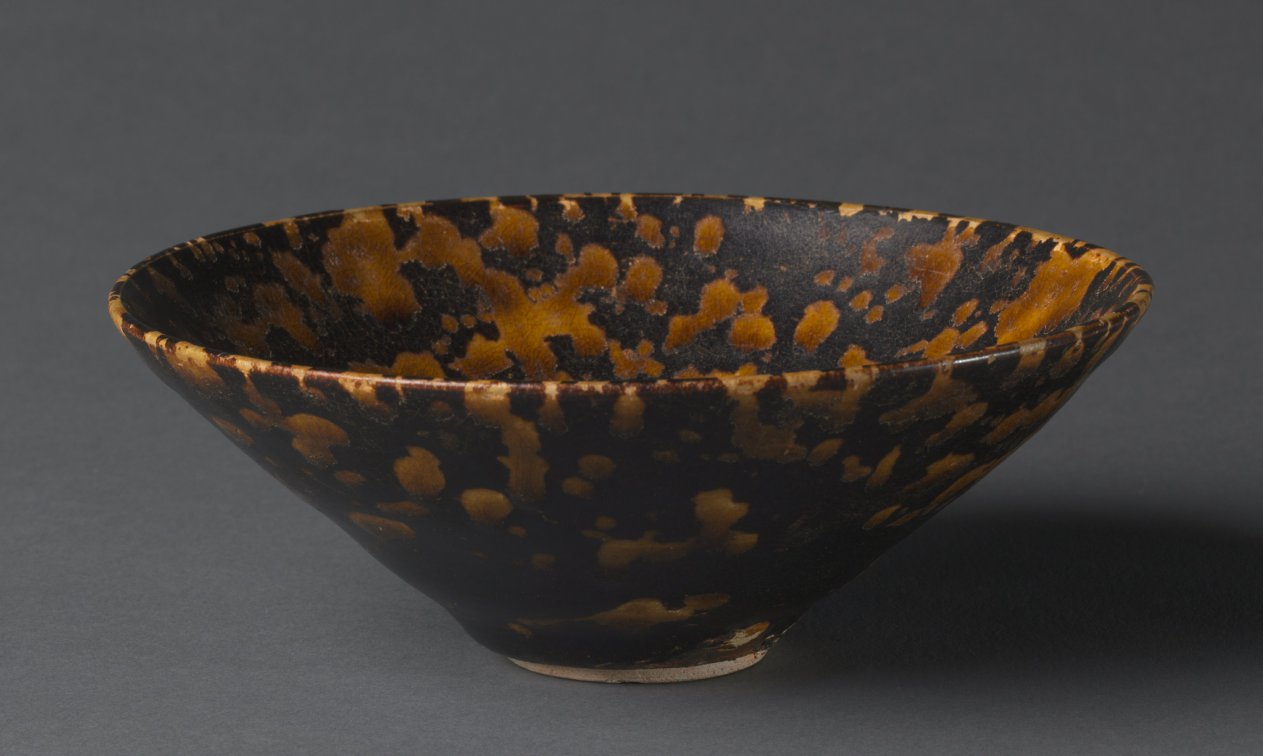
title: Conical Bowl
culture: China, Jiangxi Province, Ji'an, Southern Song dynasty (1127–1279)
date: 1100s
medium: stoneware with "tortoise shell" glaze, Jizhou ware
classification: Ceramic